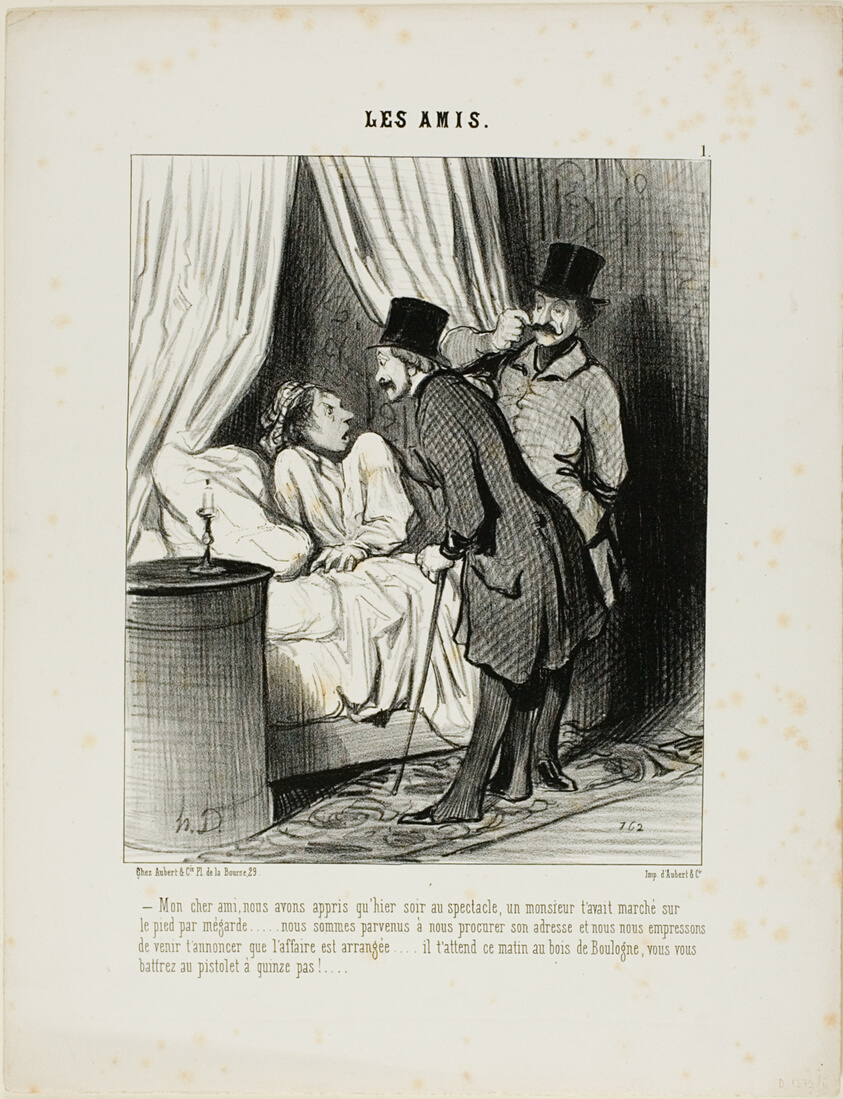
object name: Print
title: “- My dear friend, we have learned yesterday at the theatre that a gentleman has inadvertedly stepped on your foot.... We have come to get his address and we are eager to announce that the affair is arranged.... He is waiting for you this morning in the Bois de Boulogne. You will raise pistols at a distance of 15 paces,” plate 1 from Les Amis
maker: Honoré Victorin Daumier; French, 1808-1879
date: 1845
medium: Lithograph in black on ivory wove paper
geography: France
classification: lithograph; print; prints and drawing